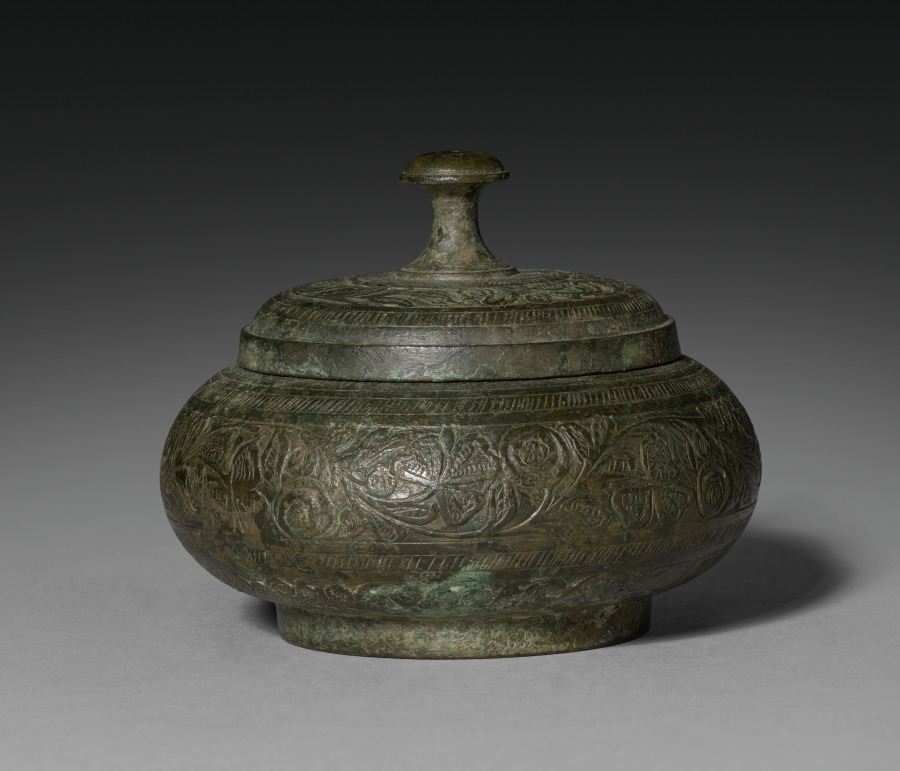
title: Reliquary Box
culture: Pakistan, Gandhara, probably Swat, late Kushan period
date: 200–400 CE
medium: bronze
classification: Metalwork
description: This casket in bronze represents the great variety of reliquary caskets. It is round, has a low foot, and is covered with a lid (with raised handle) that fits over the vessel rather than being inset. It is a traditional shape frequently encountered in Gandharan reliquaries, but its slight flattening and elaborate decoration imply a slightly late date. A central band of a floral creeper decorates the main body of the box and its lid, and is framed on both sides by narrower fluted bands. This type of freehand design is characteristic of the late Kusana-early Gupta period. Similar floral patterns are found in another CMA object (1972.164), the lid of a box showing combat between a man and a lion, which also dates to a later period. There the design fills the vacant areas in the busy composition. This pattern, however, has its antecedents in the Begram ivories . which, according to most sources, pre-date the Sasanian invasion of the mid-third century AD. Therefore, it can be assumed that this type of floral decoration was already in use in the third century and that this reliquary box probably dates to the third-fourth century AD. The bronze alloy, in its somewhat silverish-metallic appearance, seems to be very close to the material used in the Swat bronzes, which suggests that Swat may also be the provenance for this reliquary.